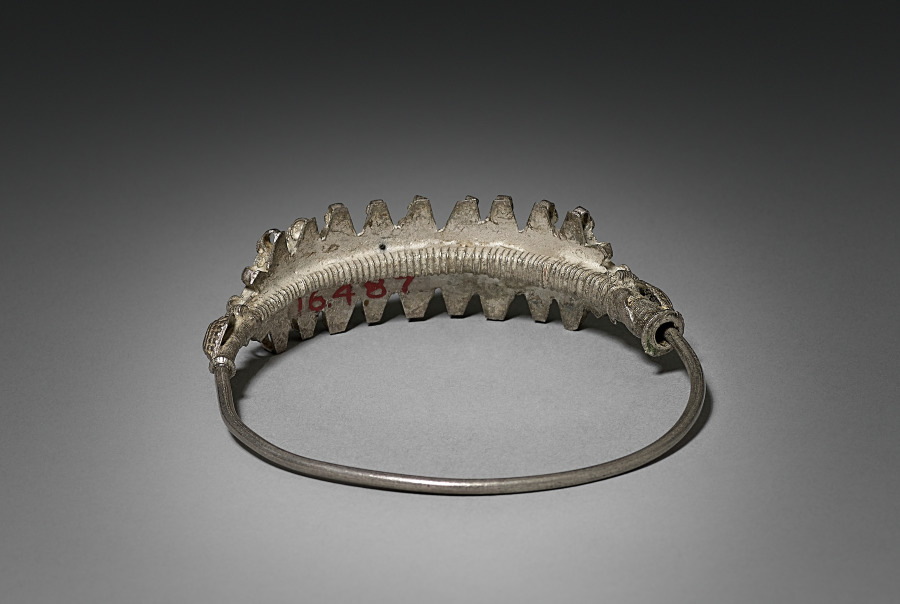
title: Nose Ring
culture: India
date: early 1900s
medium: silver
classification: Jewelry